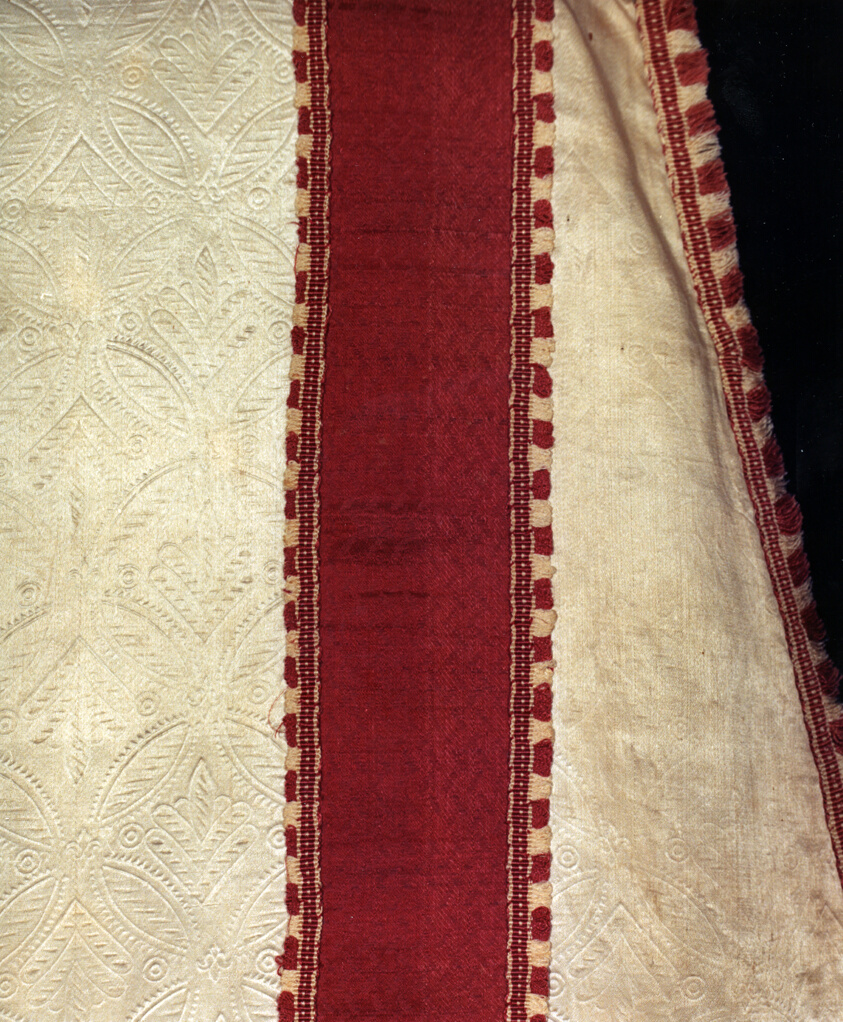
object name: Textile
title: Dalmatic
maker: Spain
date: c. 1600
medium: Silk, warp-float faced 4:1 satin weave; stamped; apparels and orphrey bands: 4:1 satin damask weave; fringe: warp-faced plain weave with extended ground weft uncut fringe; closures of oblique interlacing; lined with linen, plain weave; glazed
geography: Spain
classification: textile; weaving; costume; liturgical